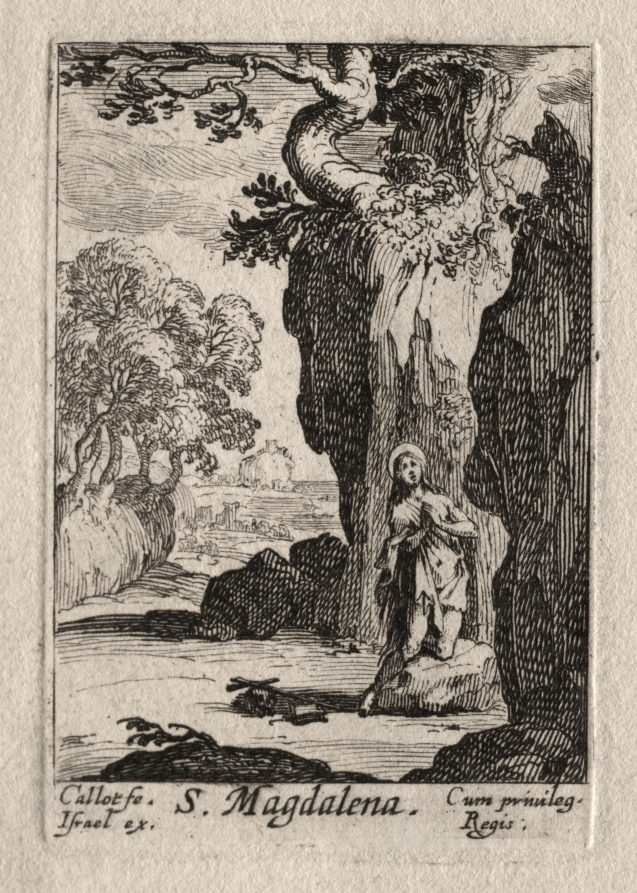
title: Les Penitents: St. Madeleine repentante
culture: France, 17th century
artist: Jacques Callot (French, 1592–1635)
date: ca. 1632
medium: etching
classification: Print